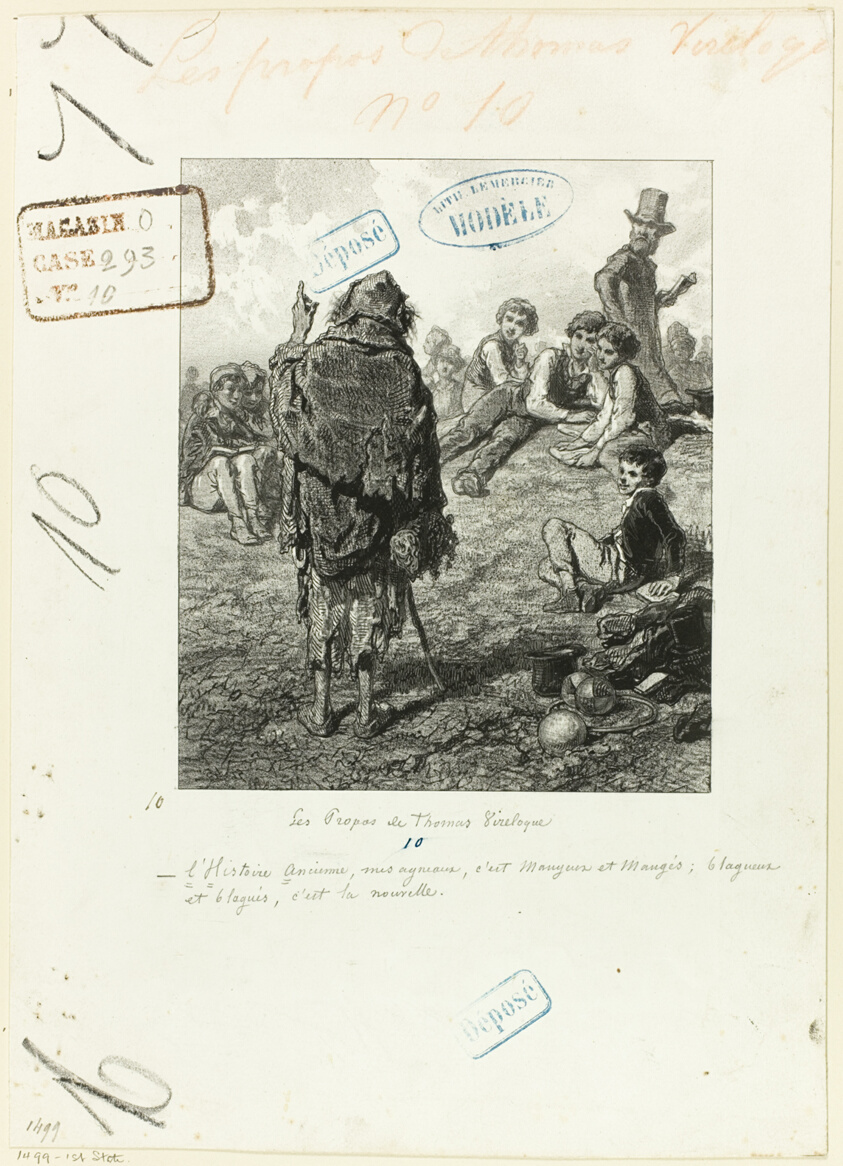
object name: Print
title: Les Propos de Thomas Vireloque: The old story, my lambkins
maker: Paul Gavarni (French, 1804-1866)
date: 1852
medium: Lithograph in black on cream wove paper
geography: France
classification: lithograph; print; prints and drawing